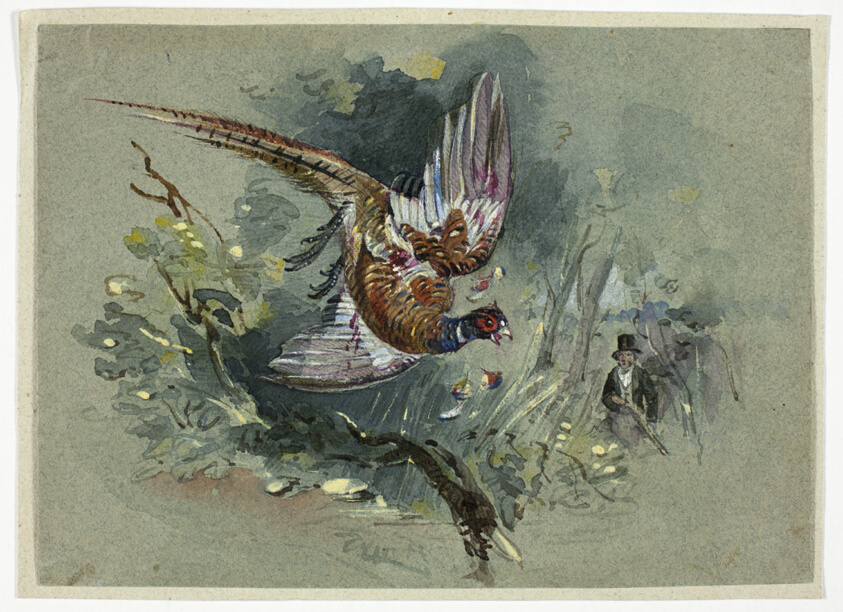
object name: Drawing and Watercolor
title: Pheasant and Hunter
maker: Charles B. Newhouse (English, 1805-1877)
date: 1825-1877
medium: Watercolor and gouache heightened with gum varnish on blue wove paper, tipped onto gray laid paper Remarks: NG "Worth taking out"=LS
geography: England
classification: watercolor; drawings (visual works); prints and drawing